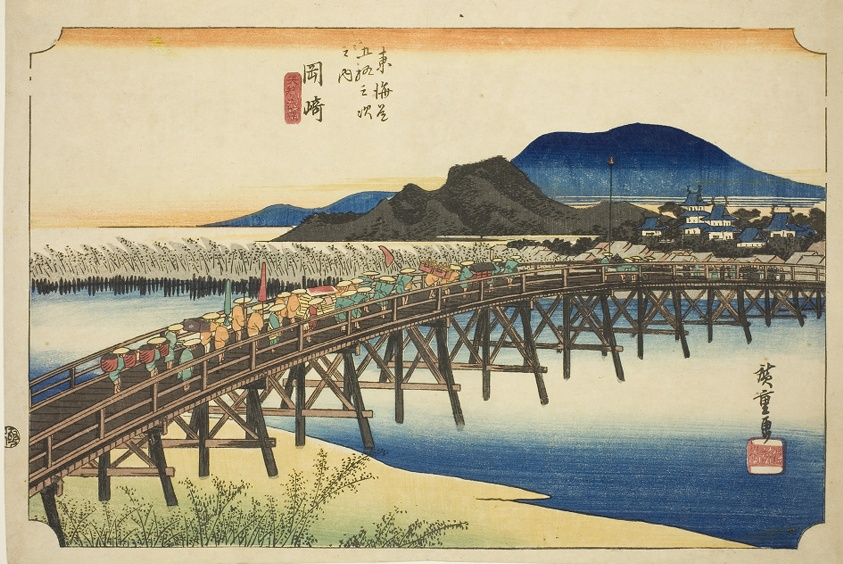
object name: Print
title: Okazaki: Yahagi Bridge (Okazaki, Yahagi no hashi), from the series "Fifty-three Stations of the Tokaido (Tokaido gojusan tsugi no uchi)," also known as the Hoeido Tokaido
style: Japanese (culture or style)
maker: Utagawa Hiroshige 歌川 広重; Japanese, 1797-1858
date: c. 1833/34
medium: Color woodblock print; oban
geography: Japan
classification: woodblock print; print; asian art